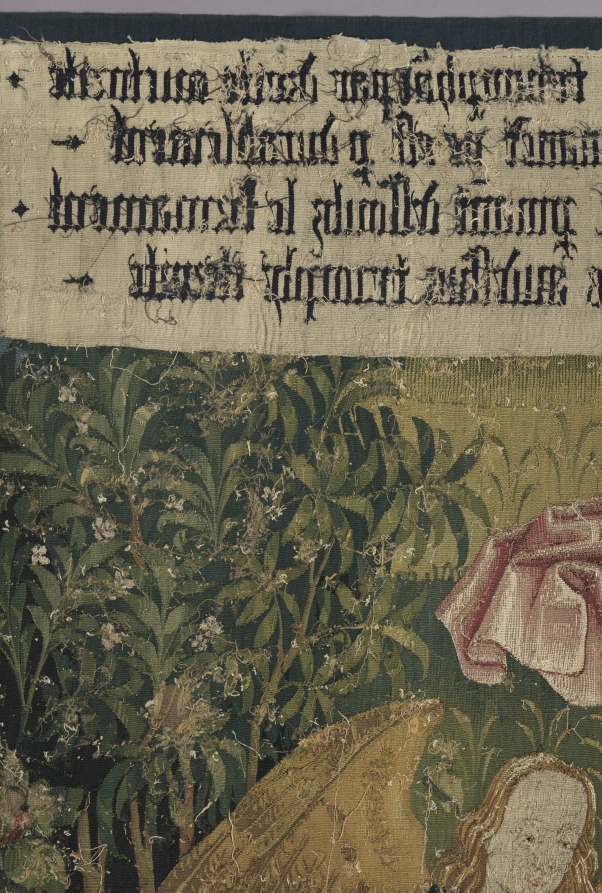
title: The Triumph of Eternity (from Chateau de Chaumont set)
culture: France, Lyon(?), early 16th century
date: 1512–15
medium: silk and wool; tapestry weave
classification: Tapestry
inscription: French verse in Gothic letters translates as follows: "Nothing triumphs by right authority, Unless it be conducted by Eternity. Nothing is permanent beneath the firmament, But above us triumphs Eternity."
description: The Triumph of Eternity is represented by the Coronation of the Virgin. Dressed in crimson velvet with an opulent brocaded velvet shawl, the Virgin is seated in the center as two angels hold a crown over her head. Five musical angels surround her playing an organ, recorder, straight cornetto, harp, and lute, while another sings from an open music book. The scenes in the set display a conservative style in which the figures are placed in shallow landscapes, thereby ignoring pictorial innovations for depicting space and mass. The verse in Old French at the top states: Nothing triumphing by due authority Remains permanent and durable. Nothing is permanent under the heavens, But above, eternity triumphs.